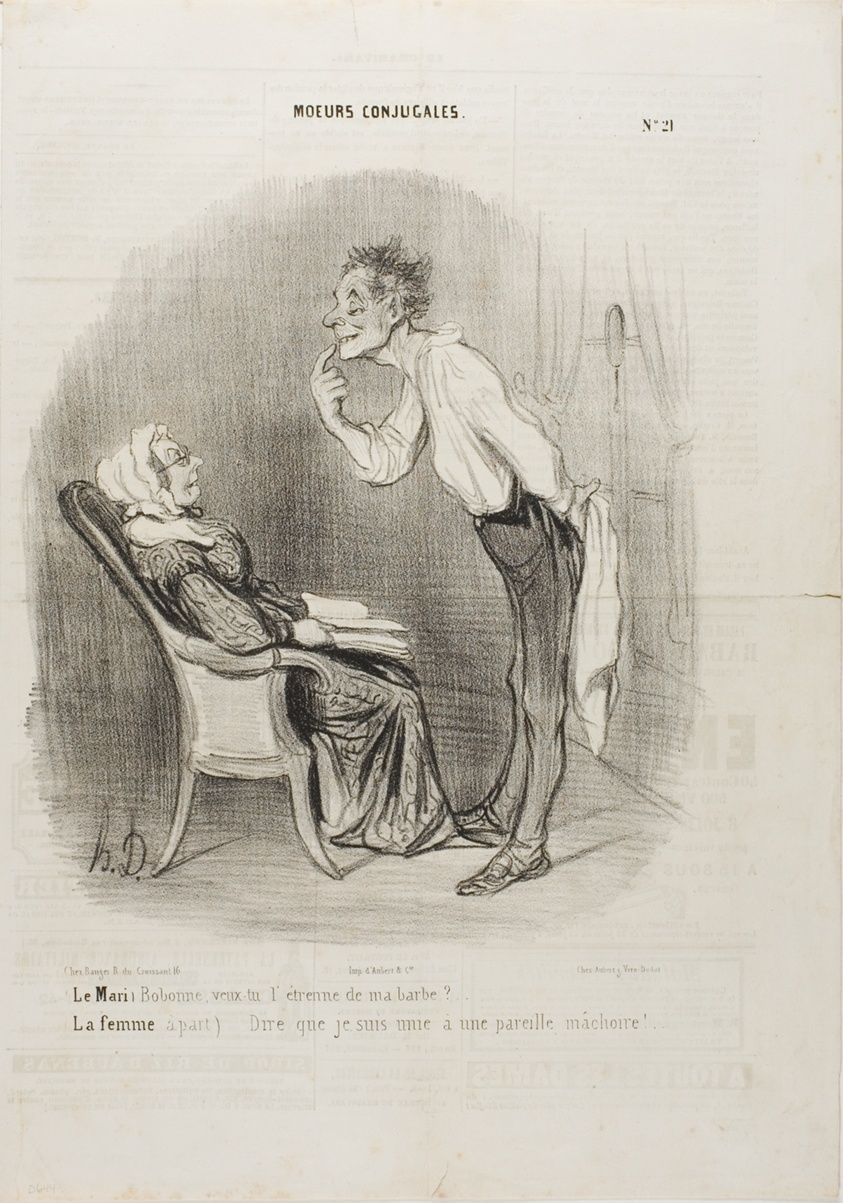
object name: Print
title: Husband: “My dear, how about a first kiss on my chin?” The wife (aside): “To think that I am married to this face!,” plate 21 from Moeurs Conjugalesa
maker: Honoré Victorin Daumier; French, 1808-1879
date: published March 29, 1840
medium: Lithograph in black on cream wove paper, with text added in another hand and letterpress verso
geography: France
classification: lithograph; print; prints and drawing